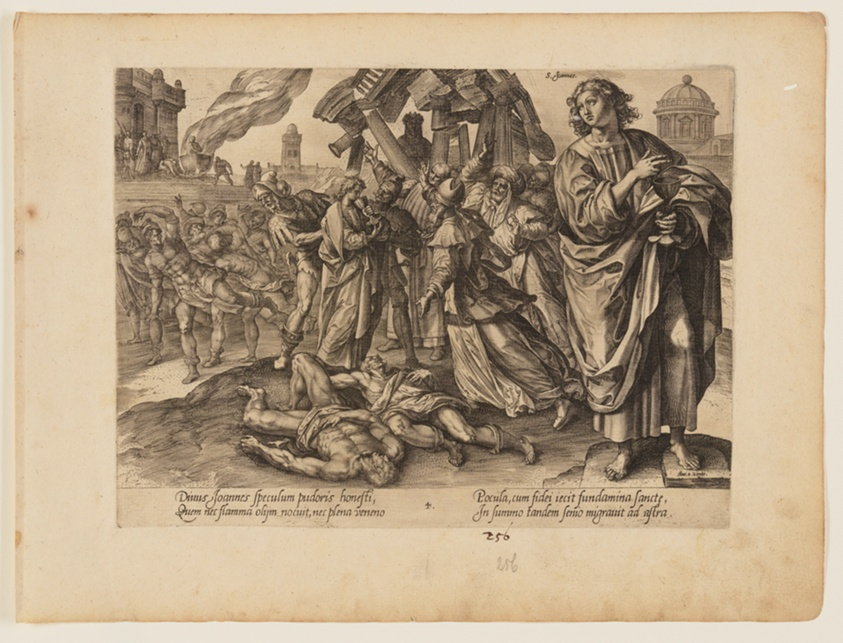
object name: Print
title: The Martyrdom of St John, from The Martyrdom of Christ and the Apostles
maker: Hendrick Goltzius (Dutch, 1558–1617); after Maarten de Vos (Flemish, 1532–1603); published Hieronymus Cock (Netherlandish, c. 1510–1570)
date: c. 1578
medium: Engraving on ivory laid paper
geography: Netherlands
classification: engraving; paper; print; prints and drawing